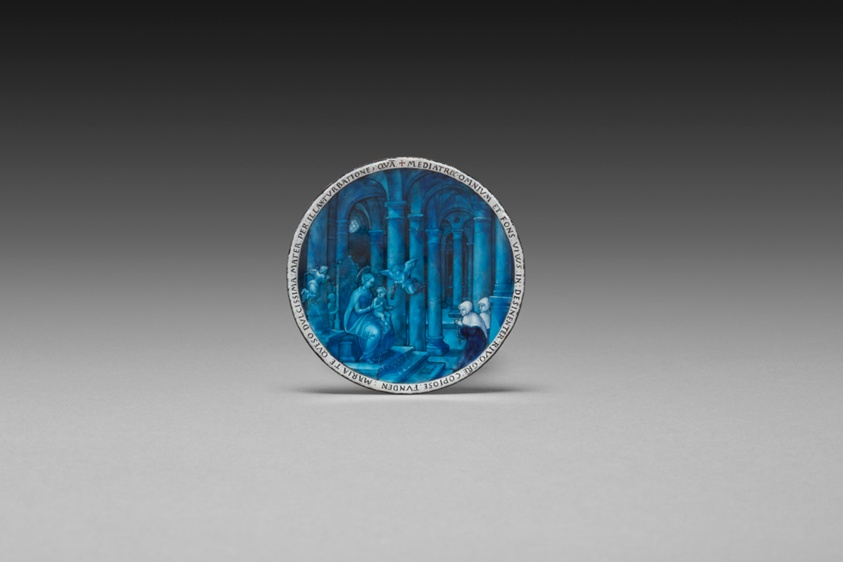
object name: Decorative Arts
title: Medallion, probably Margaret of Lorraine (recto); the Virgin Seated on a Throne Before Two Widows (verso)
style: Renaissance, 16th Century, limoges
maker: Attributed to Léonard Limosin (French, c. 1505–c. 1577)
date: c. 1530–c. 1540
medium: Painted enamel on copper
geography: Limoges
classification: limoges; enamel; european decorative arts; medallion; portrait; private devotion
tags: Virgin and child/Madonna and child, angels, five sorrows of the Virgin, Margaret of Lorraine, praying, private devotion